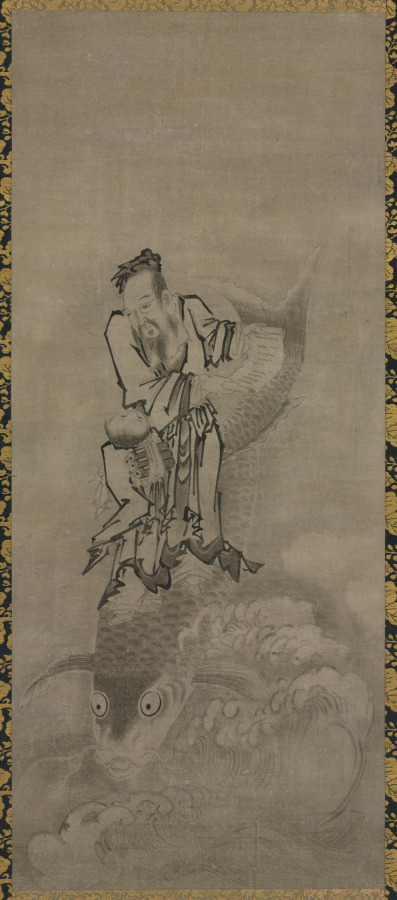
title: Hotei with Daoist Immortals: Immortal Riding Carp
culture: Japan, Edo period (1615–1868)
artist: Kyūseki Tomonobu (Japanese, 1653–1721)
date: late 1600s-early 1700s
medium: triptych of hanging scrolls: ink on paper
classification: Painting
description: Hotei was a Chan (Japanese: Zen) monk living in China during the 900s who, in the 1300s, became a legendary figure in Japan. At that time a popular cult praising him sprang up, extending beyond Zen to other religious communities. This rare triptych embraces a central Zen icon with flanking Daoist images, thereby suggesting the compatibility, rather than the exclusivity, of these two creeds. Hotei also enjoys popularity in Japan as a kind of genre, or folk figure, which explains his mirthful expression in Japanese paintings. The Daoist figures in contrast appear eccentric and foreign-looking, in keeping with Daoist lore. When these paintings came to the museum their appearance was compromised by poor quality textile mountings and cracked paper surfaces deserving of restoration. The fact that these scrolls constituted an integral set that properly had to be shown as a unit heightened the need to stabilize their condition and improve their presentation for museum visitors. A complete remounting of each scroll occurred following the cleaning of the paper surfaces and the repair of the lifting surface areas. No inpainting was done, thereby preserving the original ink values and brushstrokes.